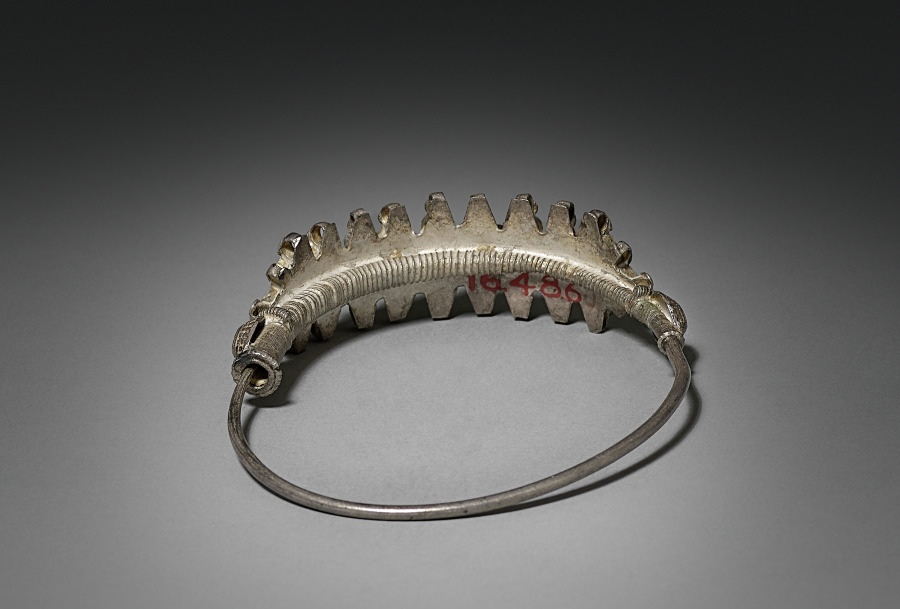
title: Nose Ring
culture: India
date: early 1900s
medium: silver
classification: Jewelry